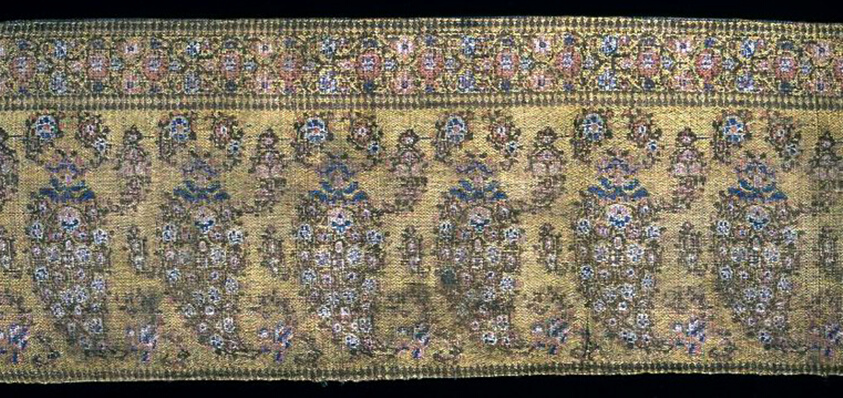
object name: Textile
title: Fragment (Border)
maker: Probably Middle or Near East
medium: Silk and gilt strip wound around a silk fiber core, plain weave with complementary wefts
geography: Middle East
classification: textile; weaving